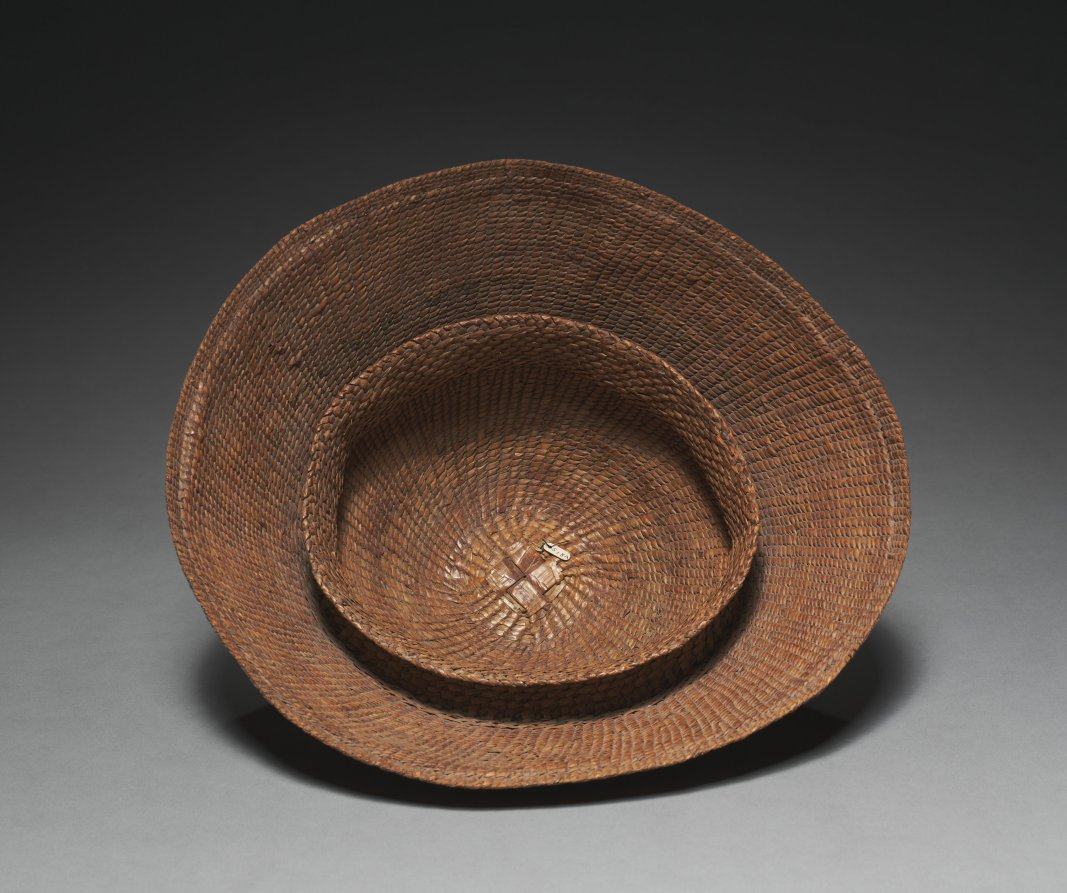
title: Hat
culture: Northwest Coast, Nuu-chah-nulth or Makah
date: before 1929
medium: cedar bark; twined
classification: Basketry